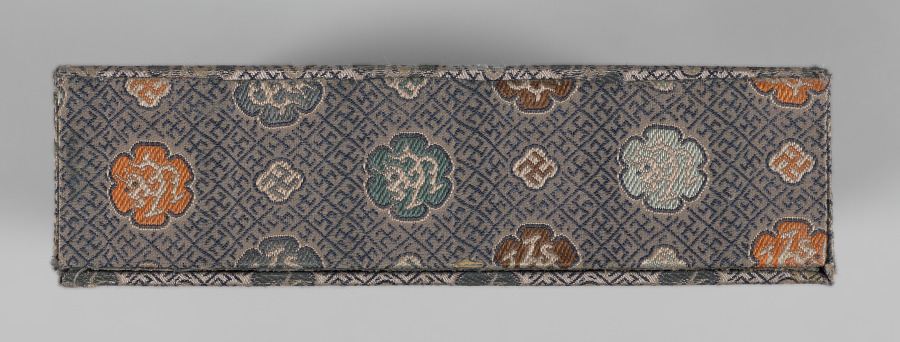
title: Yu-hai (Ocean of Jade) woodblock bound volume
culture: China, Ming dynasty (1368–1644)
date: 1368–1644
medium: woodblock-printed book with painted edges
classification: Bound Volume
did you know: When each book is rolled to form a cylinder, a landscape appears on the edges, painted in ink and washes of color.